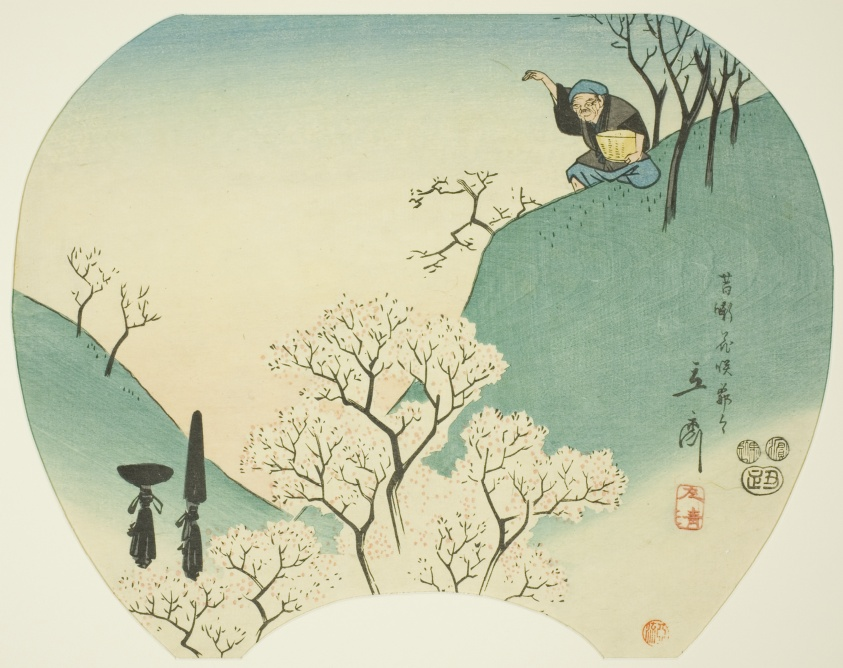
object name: Print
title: Ancient Story of the Old Man Who Made the Trees Blossom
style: Japanese (culture or style)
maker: Utagawa Hiroshige 歌川 広重; Japanese, 1797-1858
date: 1853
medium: Color woodblock print; uchiwa-e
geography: Japan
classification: woodblock print; print; asian art